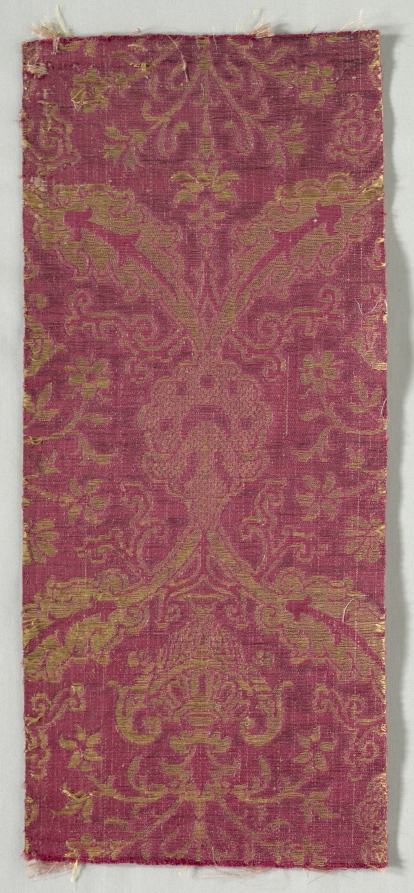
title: Textile Fragment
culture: Italy or Spain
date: 1550–99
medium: lampas weave(?)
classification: Textile